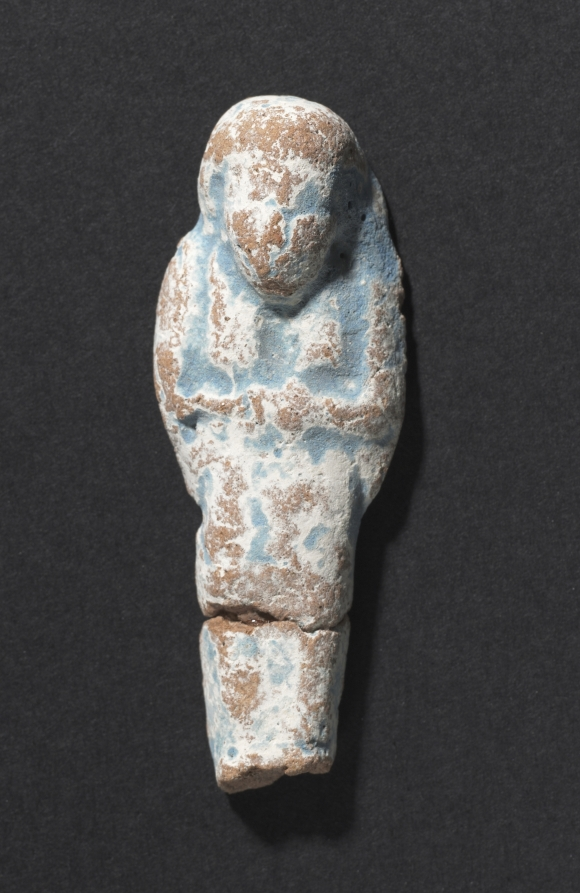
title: Shawabty of Ditamenpaankh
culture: Egypt, Late period (715–332 BCE), Dynasty 25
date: 715–656 BCE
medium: terracotta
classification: Funerary Equipment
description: High demand for shawabtys in the Late Period, a time when as many as 400 or more shawabtys were placed in the tomb with the deceased, gave rise to a specialized container for storing them: the shawabty box. This example is inscribed for the lady of the house, Ditamenpaankh, and was probably one of a pair originally made for her. The single-masted boat on the box's lid is perhaps an allusion to the pilgrimage of the deceased to the holy city of Abydos, the cult city of Osiris, king of the dead. The shawabtys inside are crude, mass-produced examples cast in an open mold. Made of terracotta, their blue paint imitates more costly shawabtys made of faience. As for the shawabty spell, it has been removed from its traditional location on the shawabty's front and relocated onto the sides of box, where it needed only to be written once, thus expediting production.